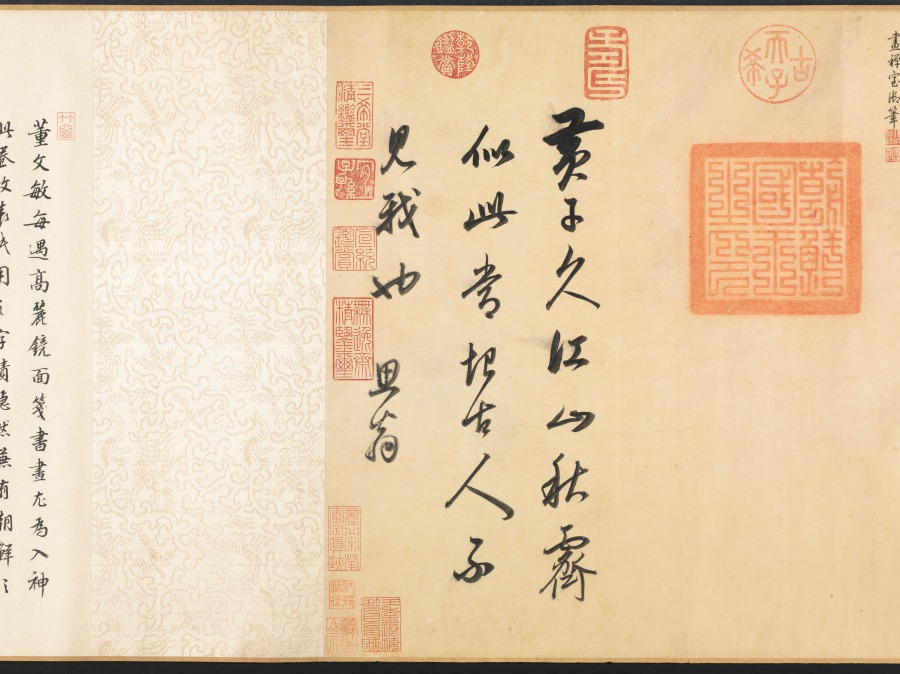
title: River and Mountains on a Clear Autumn Day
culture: China, Ming dynasty (1368–1644)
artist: Dong Qichang (Chinese, 1555–1636)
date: c. 1624–27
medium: Handscroll; ink on Korean paper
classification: Painting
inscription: 黃子久江山秋霽似此，當恨古人不見我也。思翁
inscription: 董文敏每遇高麗鏡面箋，書畫尤為入神。此卷改表紙用之，字跡隱然，兼有朝鮮之印。至於筆法圓秀，真接倪黃。豈文沈所可同日而語也。 康熙庚午中秋後一日，天氣澄爽，重裝初畢，跋於瓶廬。抱瓮翁高士奇。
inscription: Second inscription by Gao Shiqi 高士奇 (1645–1704): On the twenty-third day of the ninth month, the jiaxu year of the Kangxi era [1694], I packed my bags to head north. When my boat passed Wuchang [Suzhou], Mr. Mantang [Song Luo] brought wine to bid me farewell so that we could share our thoughts on our separation in the last few years. I showed him the paintings and calligraphy which I collected and asked his opinions. Since Mr. Mantang does not own any handscrolls by Wenmin [Dong Qichang], I leave this one for him in commemoration of our parting; thus the painting will have a worthy owner and our meeting will become a beautiful story in the future. It is the fourth day after the beginning of winter, with the sky clear and sober. Trees under frost have turned red and yellow, seemingly echoing the brush and ink in the painting. I also ask Mr. Mantang to inscribe a poem to commemorate our meeting so that it will survive forever.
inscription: 1 colophon and 4 seals of Song Luo 宋犖 (1634–1713): Who is the foremost art connoisseur of our dynasty?/ Tangcun [Liang Qingbiao, 1620–1691] is dead, so the title passes to Jiangcun [Gao Shiqi]./ Leaving office, you retired for five years in the Lake region./ Fondling handscrolls and hanging scrolls from morning to evening./ You sent me your collection catalogue Xiao Xia Lu last year;/ It is indeed the true equal of [Zhou Mi's] Yun Yan Guo Yan./ This year you returned to the capital by imperial order;/ Your boat with calligraphy and paintings anchored at the river bank in Suzhou./ When we met each other you did not waste any time for conversation by poured out immediately/ From your "coral net" extraordinary treasures./ You produced incomparable scrolls, with gold-inscribed labels and jade rollers,/ Pouring out from bags and trunks, they were spread in disarray./ Without a word, I rolled and unrolled until my fingers were numbed,/ We sat straight, facing each other quietly, and never felt tired./ For three days we forgot about sleeping and food./ And at times we shouted our joy out loud, forgetting who is host or guest./ Your Dwelling in the Fuchun Mountains and the Yuansheng manuscript/ These peerless works I myself examined with delight./ As an added pleasure to the farewell dinner under the Maple Bridge,/ You allowed me to hold again this handscroll by Dong Qichang--/ The Misty River and Piled Peaks [by Zhao Mengfu] and this Clear Autumn Day are two extraordinary masterpieces./ In showing such life and spirit with "qi yun." the artists were truly "men of heaven."/ The Clear Autumn Day is not even three feet long,/ Painted on tributary Korean paper, it shines like silver./ Every building up and every turn of the mountains imitates nature,/ Every tree and every rock is removed from the commonplace./ From the beginning, the theory of poetry is the theory of painting,/ Like the lotus and the morning sunshine, they complement and refresh each other./ The artist's inscription regrets that "the Old Masters cannot see my scroll."/ Huang Gongwang would have agreed in his grave./ The vermilion of the seals glitter and dazzles the eyes,/ These added accessories are as valuable as jade./ You are very kind to give it to me,/ The feelings expressed in your inscription are so sincere./ Wanting to refuse, but unable, I accept it to respect your wish,/ And taking off my gown and cap I wrapped it with care./ You asked me to write a long poem in commemoration of this beautiful occasion,/ I am too ashamed that my effort in response is so poor and inadequate./ Returning home, I unrolled it under candlelight, trying to write the colophon,/ The light of the waning moon shines at the foot of the mossy wall./ Earnestly humming and brows knit in deep thought, I try to compose;/ The verses are not outstanding, but the facts are real./ With this poem recorded at the end of the scroll, I mail it to you for approval,/ This poem and this painting shall outlast a thousand springs. (Translation by LYSL/HK/WKH)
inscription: 1 colophon and 2 seals of Shao Changheng 邵長蘅 (1637–1704); 2 inscriptions and 14 seals of the Qianlong 乾隆 emperor (r. 1736–95); 1 seal of the Jiaqing 嘉慶 emperor (r. 1796–1820); 3 seals of the Xuantong 宣統 emperor (r. 1908–11); 1 seal unidentified.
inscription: [印] 朝鮮國王之印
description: Dong Qichang had a tremendous impact on the artistic practices and historiography of later generations; his works and writings shaped literati aesthetics. Here, Dong places an abstract landscape composition diagonally across the picture plane, configured to recall earlier masters and simultaneously express his own personal style. Dong’s inscription claims, Huang Gongwang’s Autumn Day, looks like this. I truly regret the master has not seen my work. In fact, Dong Qichang may have had Dong Yuan’s Xiao and Xiang Rivers in mind, a work he owned and considered a key work in Chinese art history.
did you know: The painting has an imprint of a Korean seal that reads "Seal of the king of Joseon."